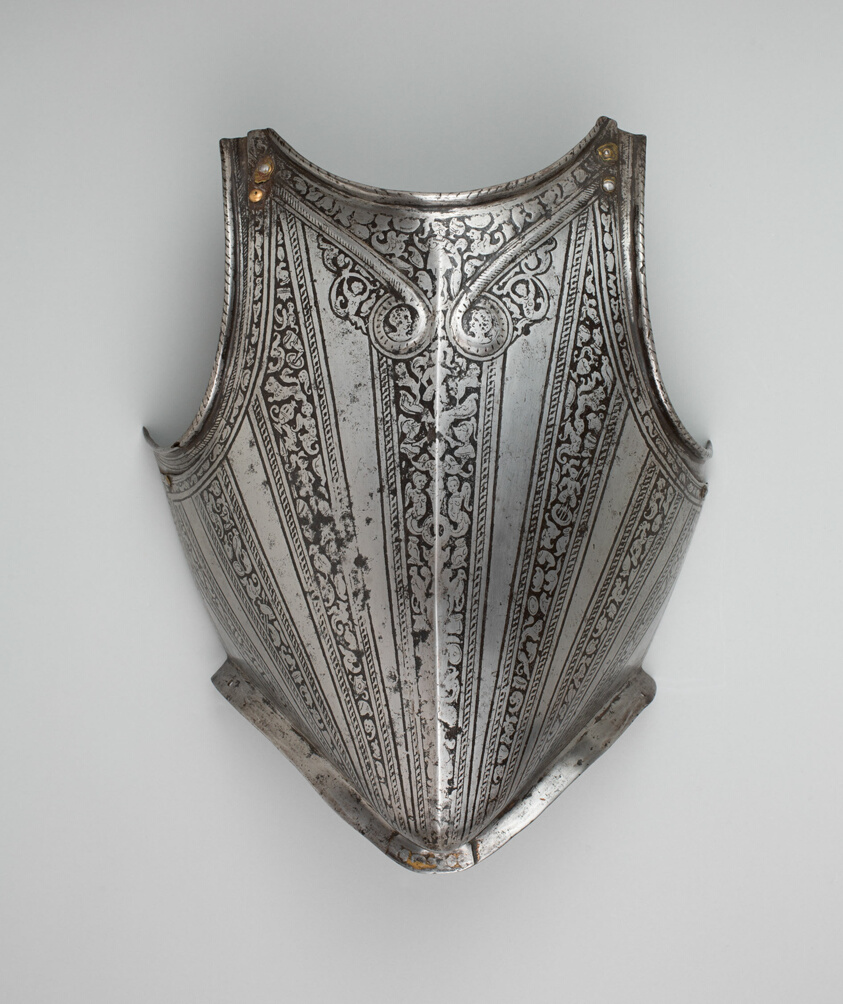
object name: Armor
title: Breastplate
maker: Italian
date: c. 1580/90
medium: Steel and brass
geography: Italy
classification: suit-element; armor; arms and armor